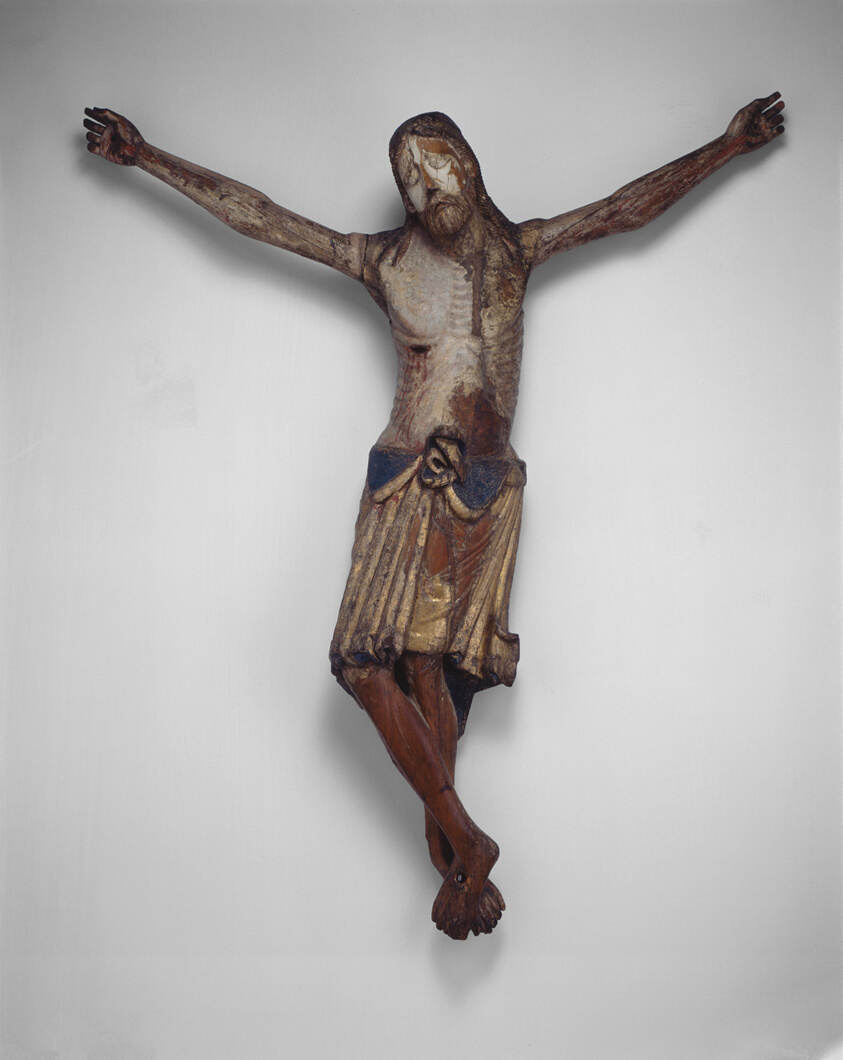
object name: Sculpture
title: Corpus of Christ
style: medieval, 13th century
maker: Spanish; Catalonia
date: 13th century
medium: Wood with traces of polychromy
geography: Spain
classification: sculpture; large scale; sculpture/wood; spanish; wood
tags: Jesus, Christianity, Christian subjects, religious figures, religious, religion, man, body, figure, crucifixions, corpus christi